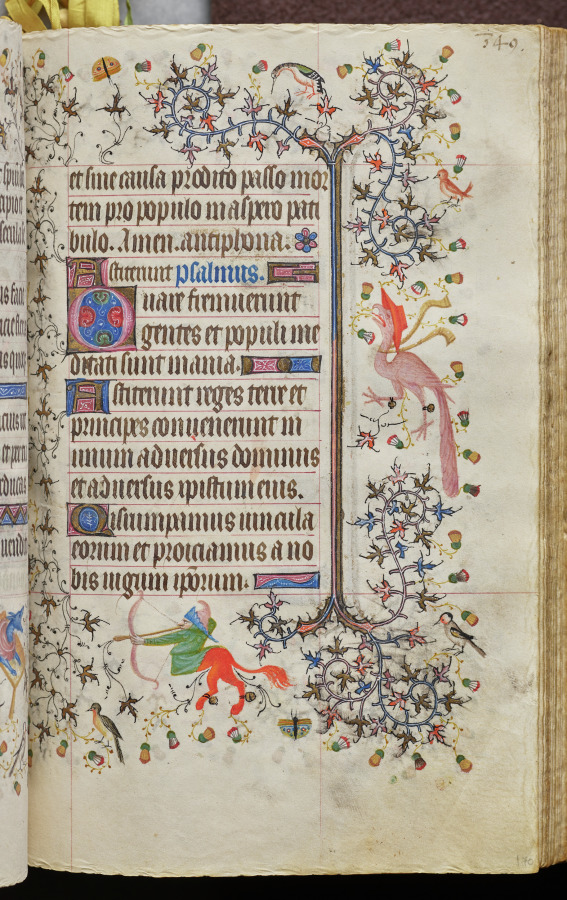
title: Hours of Charles the Noble, King of Navarre (1361-1425): fol. 170r, Text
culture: France, Paris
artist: Master of the Brussels Initials and Associates (French)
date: c. 1405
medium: ink, tempera, and gold on vellum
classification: Bound Volume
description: This precious volume was obviously highly prized by its owner, the French-born King of Navarre, who had his coat of arms painted on no less than twenty folios. Rather than directly commissioning this manuscript from a specific workshop, it seems that Charles the Noble acquired his book of hours -- perhaps ready-made for the luxury market -- while on a trip to Paris in 1404-05. A collaborative effort, six painting styles are evidenced within the pages of this codex, those of two Italians, two Frenchmen, and two Netherlanders. The painter who was responsible for the planning and decoration of the book, and who produced seventeen of the large miniatures, was a Bolognese artist known as the Master of the Brussels Initials. His principal assistant, responsible for most of the borders, was a Florentine who signed his name "Zecho" da Firenze on folio 208 verso.